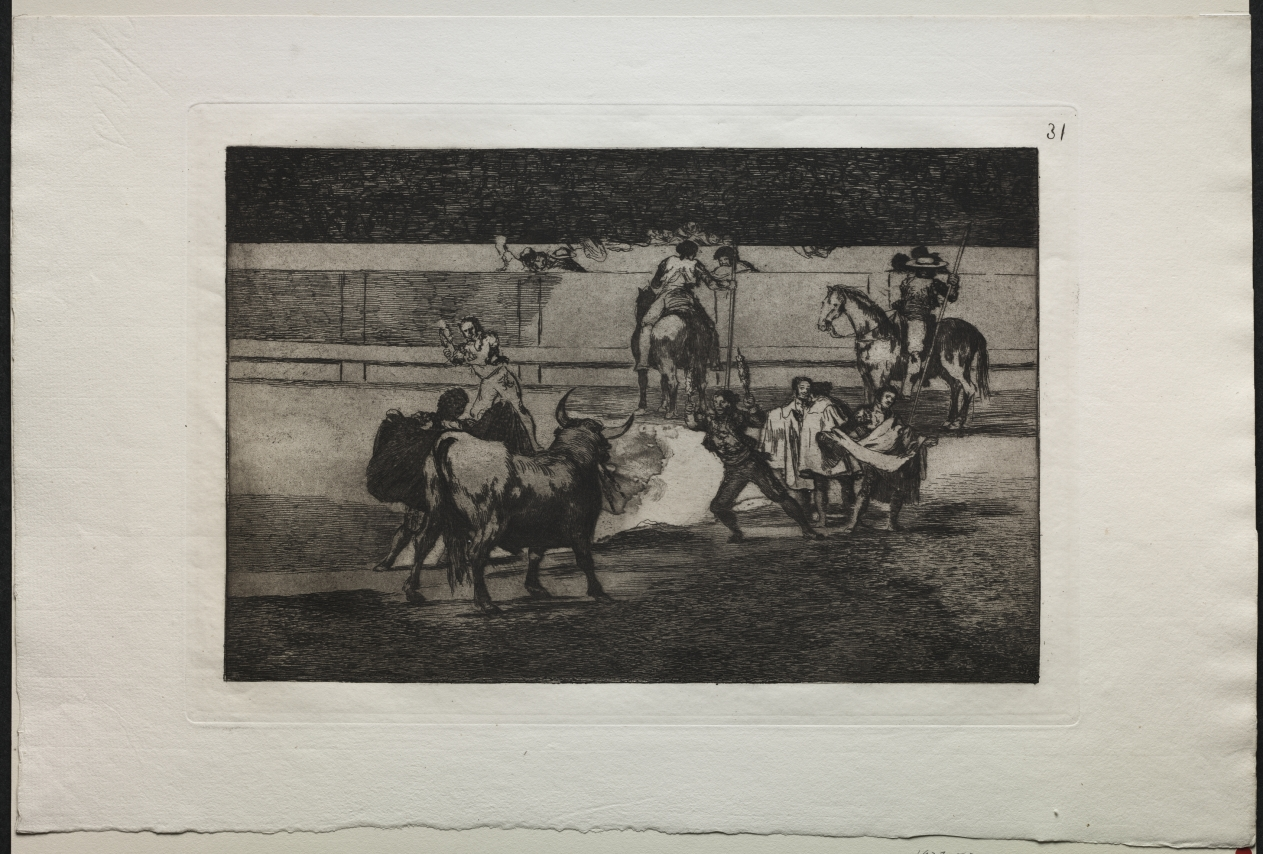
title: Bullfights: Banderillas with Firecrackers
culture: Spain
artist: Francisco de Goya (Spanish, 1746–1828)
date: 1816, printed 1876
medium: engraving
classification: Print